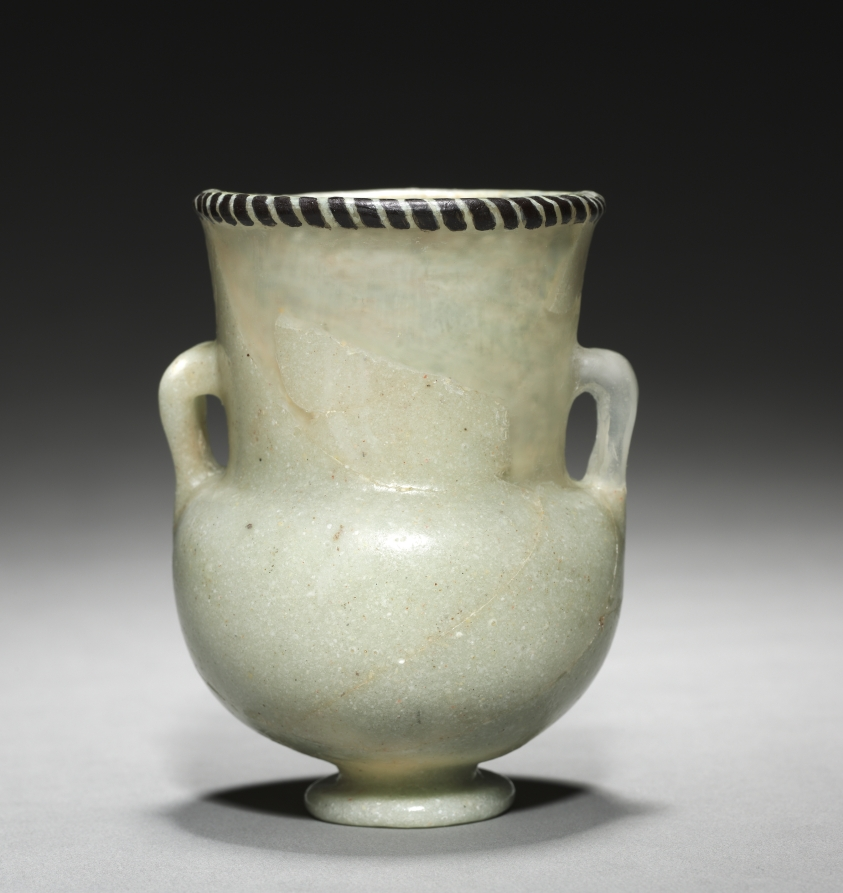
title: Unguent Bottle (Krateriskos)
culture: Egypt, New Kingdom (1540–1069 BCE), Dynasty 18, post-Amarna period or later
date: c. 1336–1295 BCE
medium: glass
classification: Vessels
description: This was probably the most popular type of Egyptian glass vessel. The milky white to sea green-colored fabric and monochrome decorative scheme are reminiscent of Egyptian alabaster. That the Egyptians would make an association between glass and stone is only natural, as the Egyptian name for glass was inr n(y) wdh or "the flowing stone."